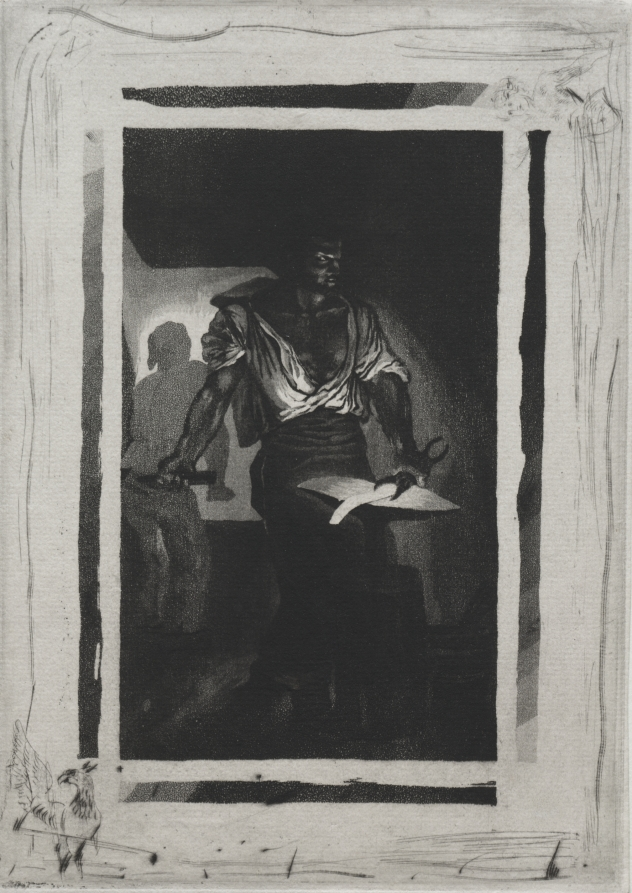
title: The Blacksmith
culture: France, 19th century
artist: Eugène Delacroix (French, 1798–1863)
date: 1833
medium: aquatint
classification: Print